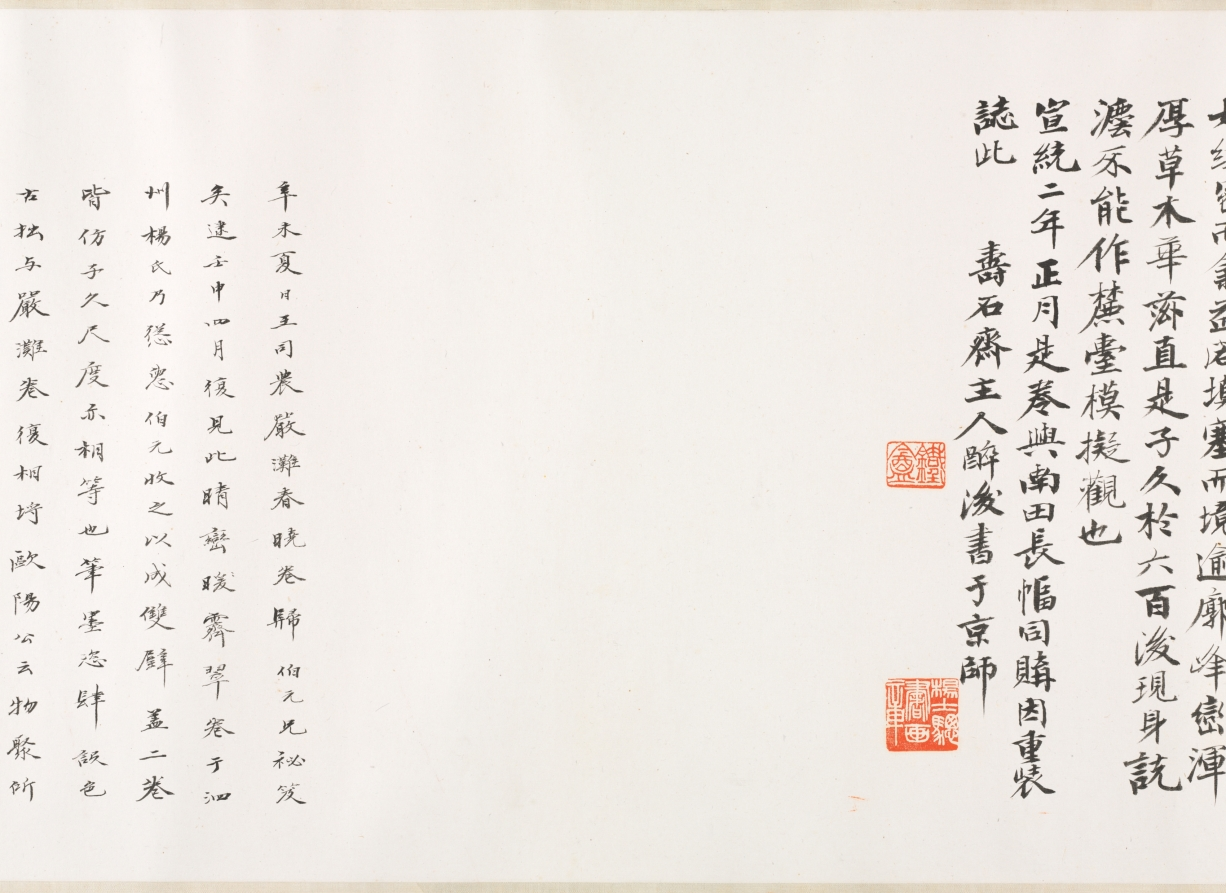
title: Green Peaks under Clear Sky: After Huang Gongwang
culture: China, Qing dynasty (1644-1911)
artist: Wang Yuanqi (Chinese, 1642–1715)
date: 1703–8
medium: handscroll; ink and light color on paper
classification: Painting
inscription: 晴巒霽翠：倣黃子久。麓臺。[印]石師道人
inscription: [印] 御書畫圖留與人看. 子久畫於宋諸大家荊、關、李、范、董、巨，無所不有。運筆不假修飾。皴法由淡入濃，化諸家之迹者也。澹明徐君偶見縮本，臨摹六幅。囑余參以富春大意，成一長卷。余夙夜在公，乘暇偶一點染。至戊子九秋告竣，閱四、五年矣。昔大癡為無用師作富春卷，七年而成，為千古鉅觀。今拙筆癡鈍。亦淹留至此。可為識者噴飯矣。王原祁題。[印]王原祁印; 麓臺 [印, 畫芯左下] 西廬後人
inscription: 3 additional colophons and 15 additional seals: 1 colophon and 9 seals of Yang Shicong 楊士驄 (b. 1870); 1 colophon of Wu Hufan 吳湖帆 (1894–1968); 1 colophon and 1 seal of Wu Mei (20th c.); 5 seals of Cheng Qi 程琦 (1911–1988).